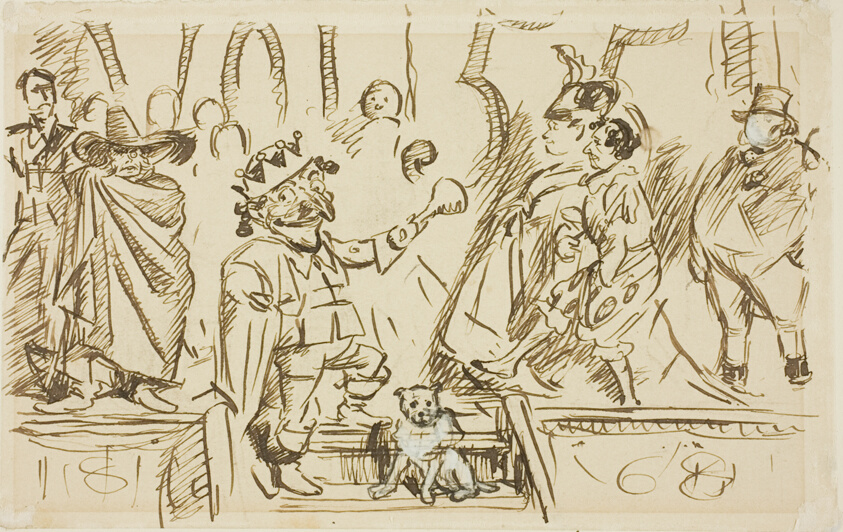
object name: Drawing and Watercolor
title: Study for Title Page, from Punch, Volume 55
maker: Charles Samuel Keene (British, 1823-1891)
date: 1868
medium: Pen and brown ink, with touches of white gouache, over graphite, on buff laid paper, laid down on ivory wove board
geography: England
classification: pen and ink drawings; drawings (visual works); prints and drawing